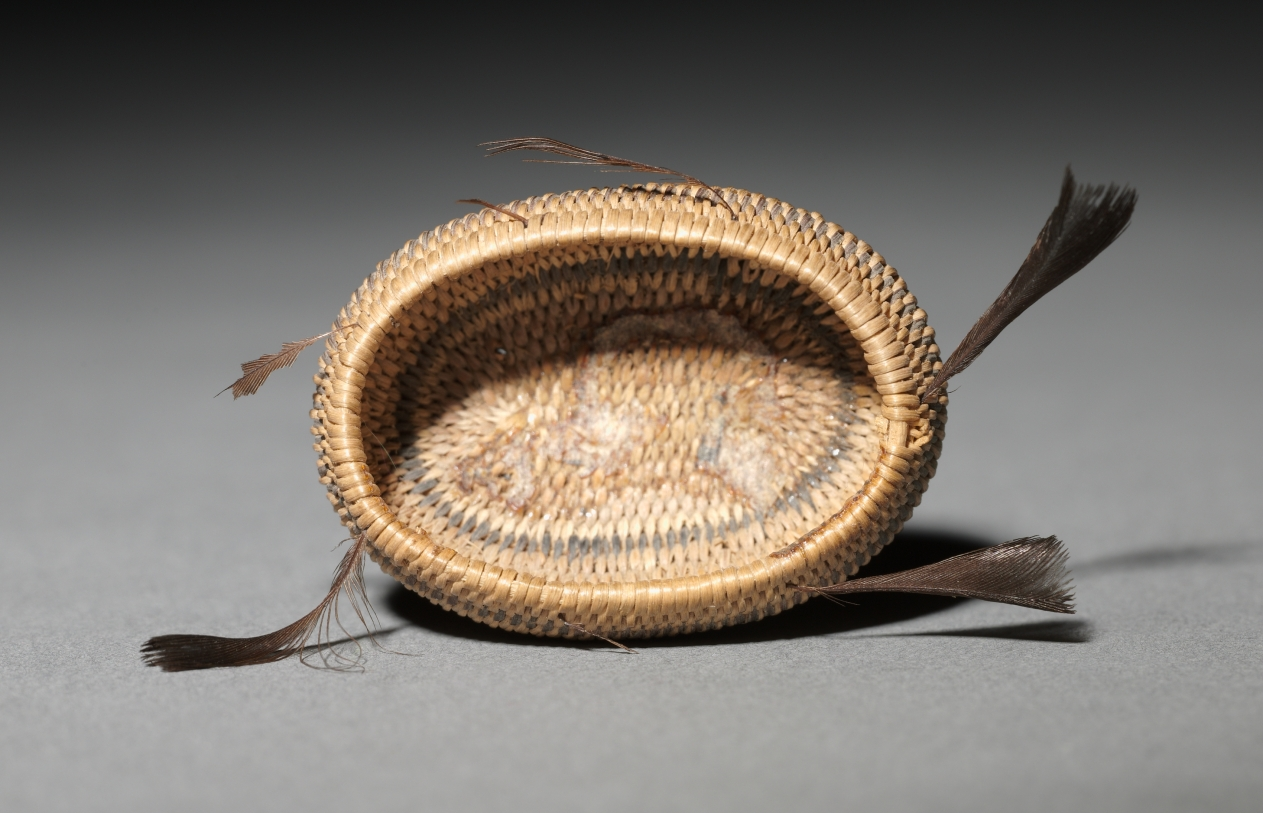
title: Miniature Rhomboidal Basket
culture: California, Pomo, 20th century (?)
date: Early 1900s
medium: coiled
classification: Basketry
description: Miniature baskets were made to demonstrate the basket-maker’s virtuoso skill, and these tiny marvels seem to be no exception—the smallest are just a few millimeters wide but still patterned. For such fine work, dexterity was required as much for preparation of materials as for weaving.